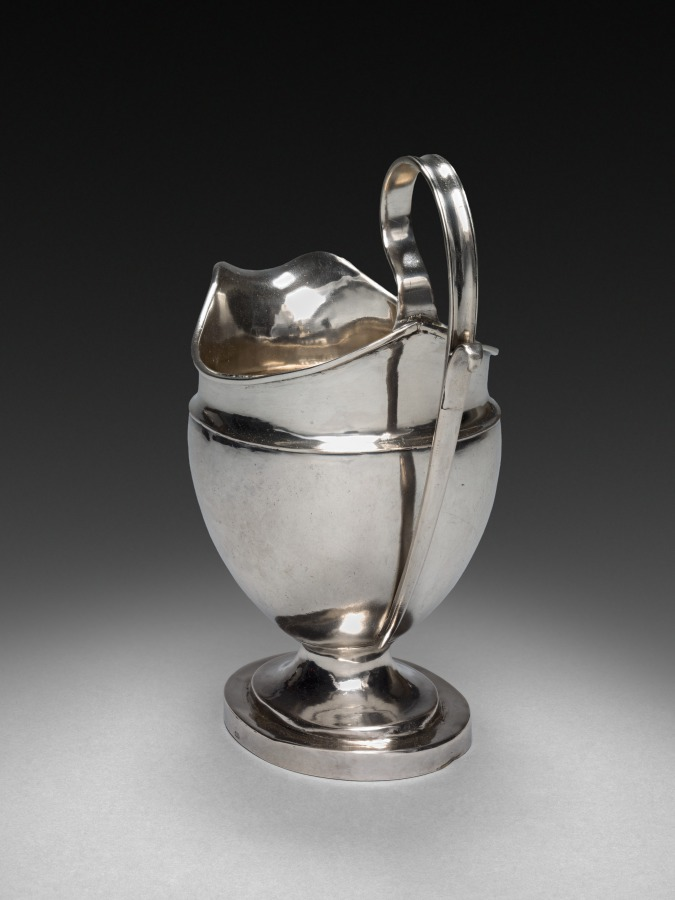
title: Cream Jug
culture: America, Pennsylvania, Philadelphia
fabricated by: William Haverstick (American, 1756–1823)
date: c. 1800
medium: silver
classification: Silver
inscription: engraved "MP" in bright-cut script on side to right of handle.